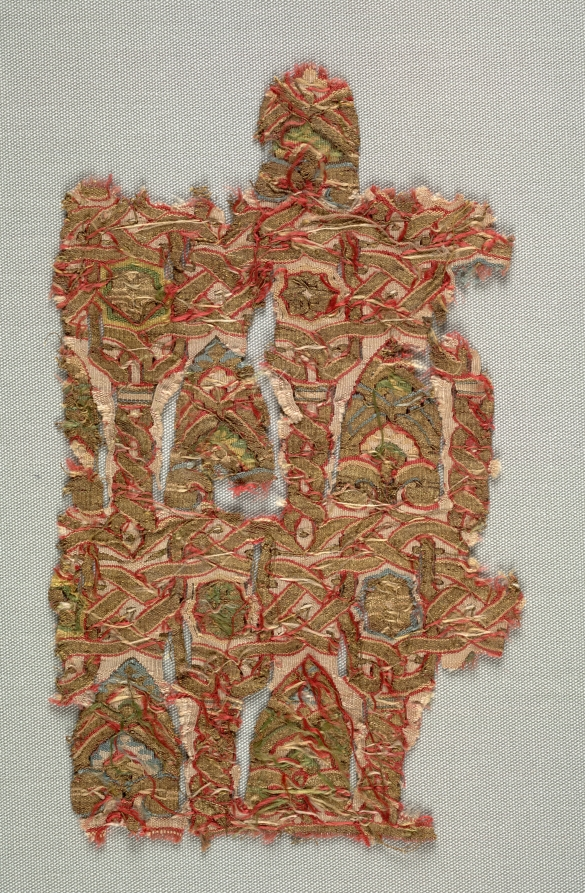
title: Fragment with arcade and palmettes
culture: Spain, probably Granada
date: 1200s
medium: Silk and gold thread: tapestry weave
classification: Textile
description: Although geometric patterns were fashionable in all media throughout the Islamic world, examples in textiles are the most abundant from Islamic Spain. In this fragment, gold-thread strapwork interlaces to form stars above columns that frame colorful palmette leaves in a fine tapestry weave.